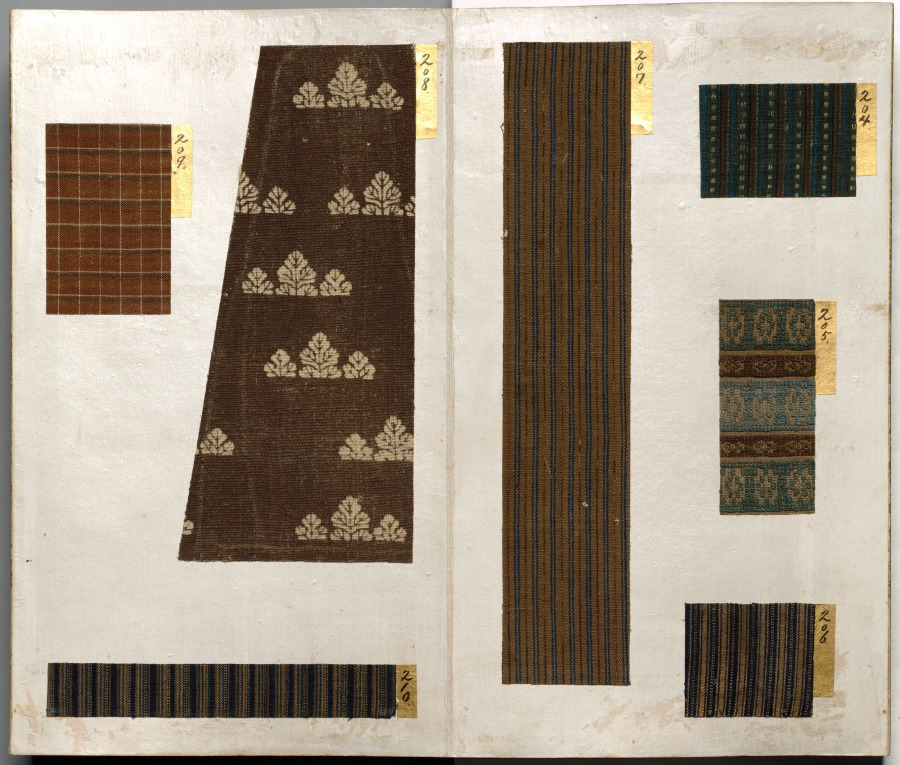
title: Album of Textile Samples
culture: Japan, Edo period (1615–1868)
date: 1600s-1700s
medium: silk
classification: Textile